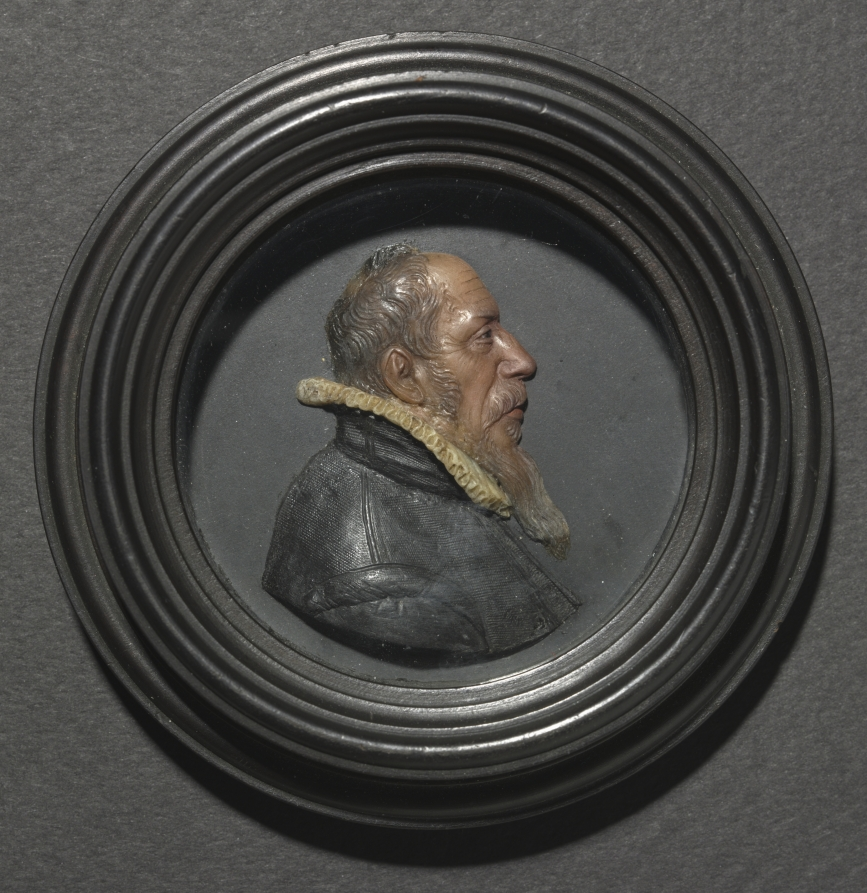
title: Portrait of a Man in Black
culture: Germany, mid 17th century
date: mid 1600s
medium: colored wax on black wood ground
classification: Portrait Miniature